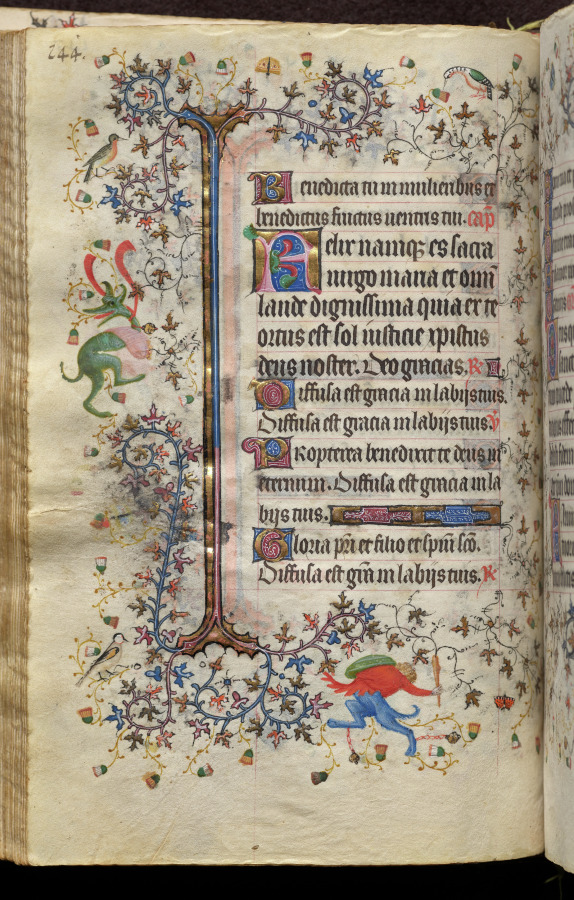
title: Hours of Charles the Noble, King of Navarre (1361-1425): fol. 72v, Text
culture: France, Paris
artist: Master of the Brussels Initials and Associates (French)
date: c. 1405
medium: ink, tempera, and gold on vellum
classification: Bound Volume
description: This precious volume was obviously highly prized by its owner, the French-born King of Navarre, who had his coat of arms painted on no less than twenty folios. Rather than directly commissioning this manuscript from a specific workshop, it seems that Charles the Noble acquired his book of hours -- perhaps ready-made for the luxury market -- while on a trip to Paris in 1404-05. A collaborative effort, six painting styles are evidenced within the pages of this codex, those of two Italians, two Frenchmen, and two Netherlanders. The painter who was responsible for the planning and decoration of the book, and who produced seventeen of the large miniatures, was a Bolognese artist known as the Master of the Brussels Initials. His principal assistant, responsible for most of the borders, was a Florentine who signed his name "Zecho" da Firenze on folio 208 verso.